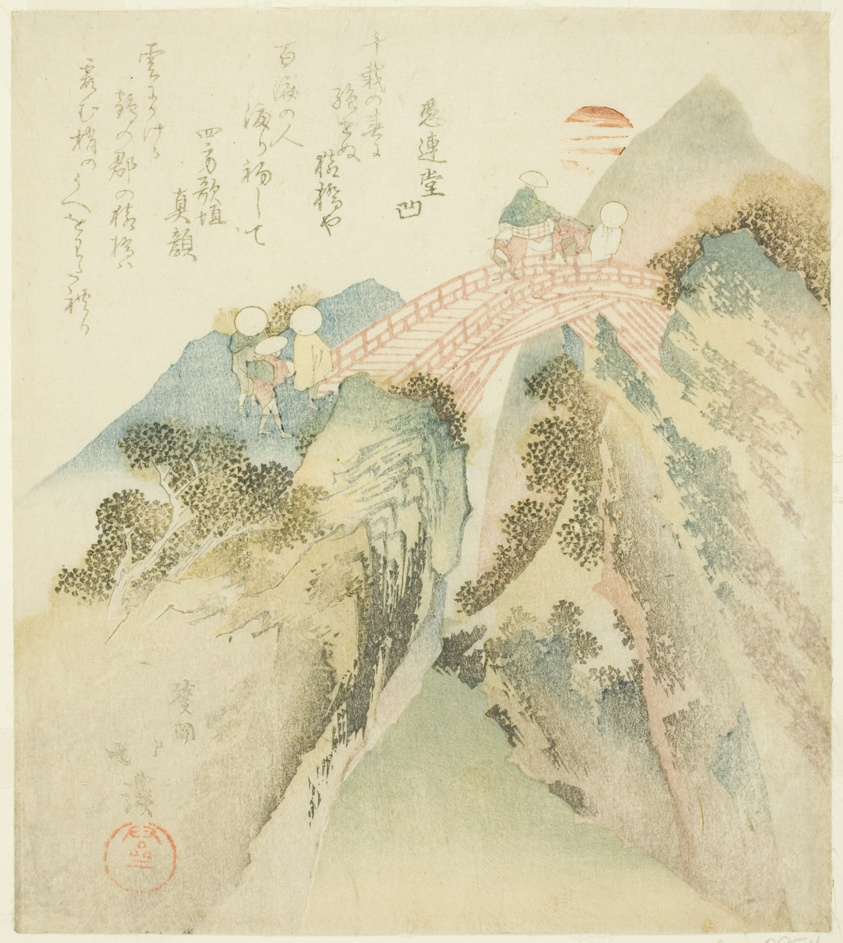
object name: Print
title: Crossing the Monkey Bridge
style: Japanese (culture or style)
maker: Totoya Hokkei (Japanese, 1780–1850)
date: 1824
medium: Color woodblock print; shikishiban, surimono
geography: Japan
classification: woodblock print; print; asian art